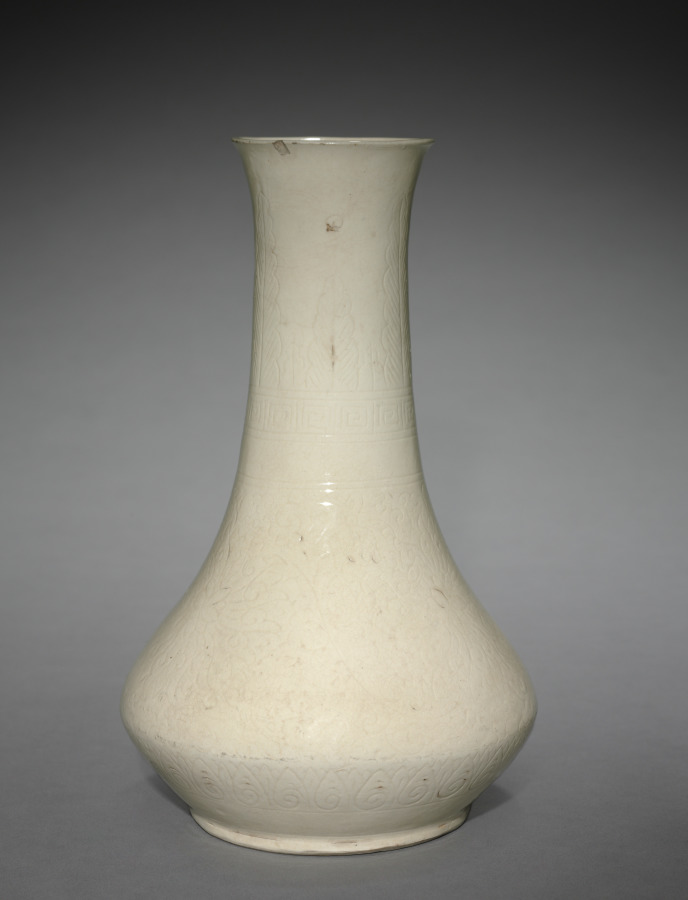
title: Vase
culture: China, Ming dynasty (1368–1644)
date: 1368–1644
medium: porcelain, Ding ware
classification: Ceramic